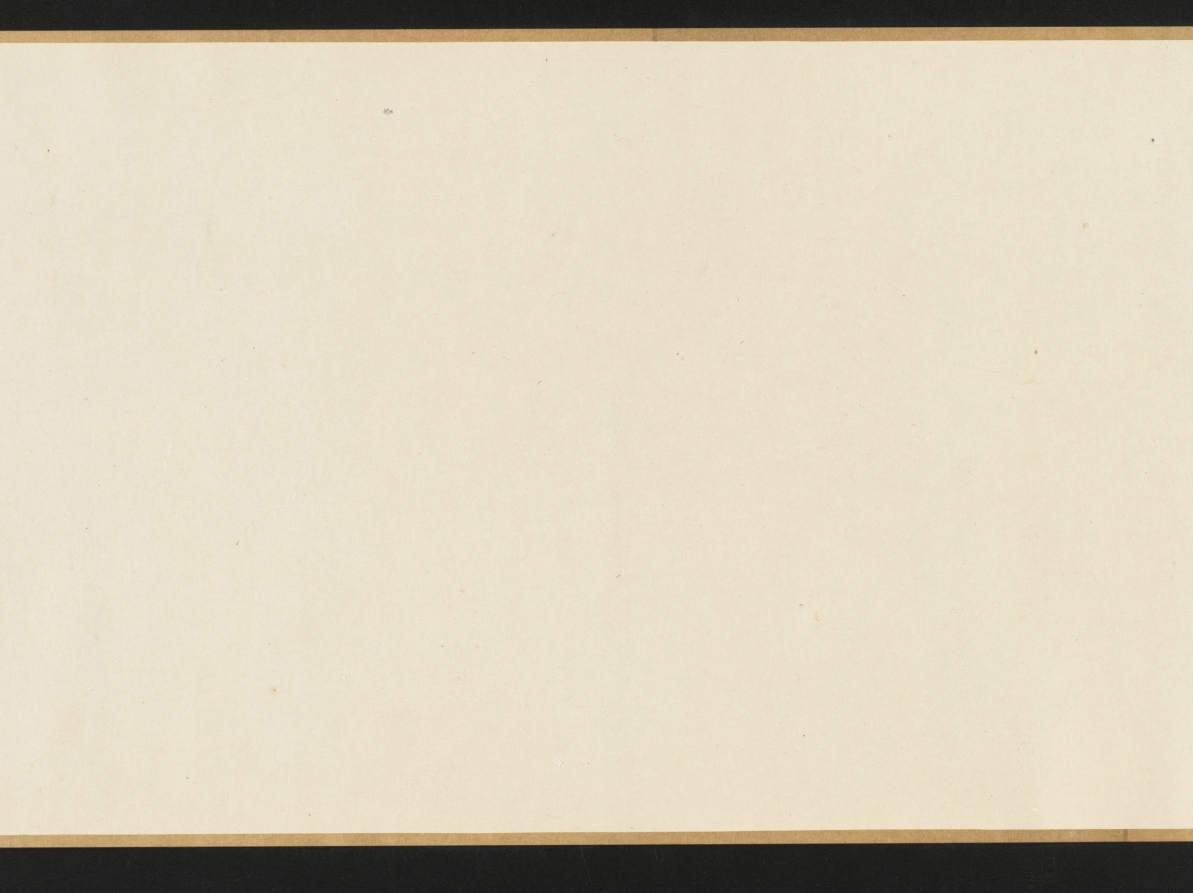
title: The Lantern Night Excursion of Zhong Kui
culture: China, Yuan dynasty (1271-1368)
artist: Yan Hui (Chinese, active 1270–1310)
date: late 1200s–early 1300s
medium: handscroll; ink and slight color on silk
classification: Painting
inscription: Artist's signature [and probable seal]: Yan Qiuyue 顏秋月 Title on frontispiece and 1 seal of Niu Shuyu 鈕樹玉 (1760–1827): Qiuyue mohuan 秋月墨幻 [Qiuyue's Ink Fantasy]. 31 additional seals: 2 of Yang Shiqi 楊士奇 (1365–1444); 2 of An Guo 安國 (1481–1534); 8 of Xiang Yuanbian 項元汴 (1525–1590); 2 of Geng Zhaozhong 耿昭忠 (1640–1686); 4 of Pu Tung 溥侗 (1870–1952); 7 of Tan Jing 譚敬 (1911–1991); 1 of Liu Ting-chih (20th c.); 5 unidentified.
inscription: An inscription by Zizhi Shanren 紫芝山人 [probably Jiang Hui 蔣惠], dated 1389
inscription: An inscription by Wu Kuan 吳寬 (1436–1504)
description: Here, the demon queller Zhong Kui leads a nightly procession of street entertainers with bare, muscular bodies and demonic faces. Some wear shabby clothes, and all perform stunts and tricks to astound and scare the viewer. In fact, a New Year custom in cities of southeast China had the poor, disguised as demons, process through the streets and play their tricks to clear households of evil spirits and welcome the spring. From right to left, a demonic figure leads the procession and beats a drum; another lifts a large rock; one stands on his hands trying to drink; one balances a jar on his elbow; three hold and wield weapons; one carries a folded chair covered by a cow’s skin; another holds Zhong Kui’s qin (zither), books, brush, and inkstone. At the end of the scroll, two figures offer a cup and bottle of wine to Zhong Kui, who lifts his hand in command.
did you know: Zhong Kui was an ancient ghostbuster.